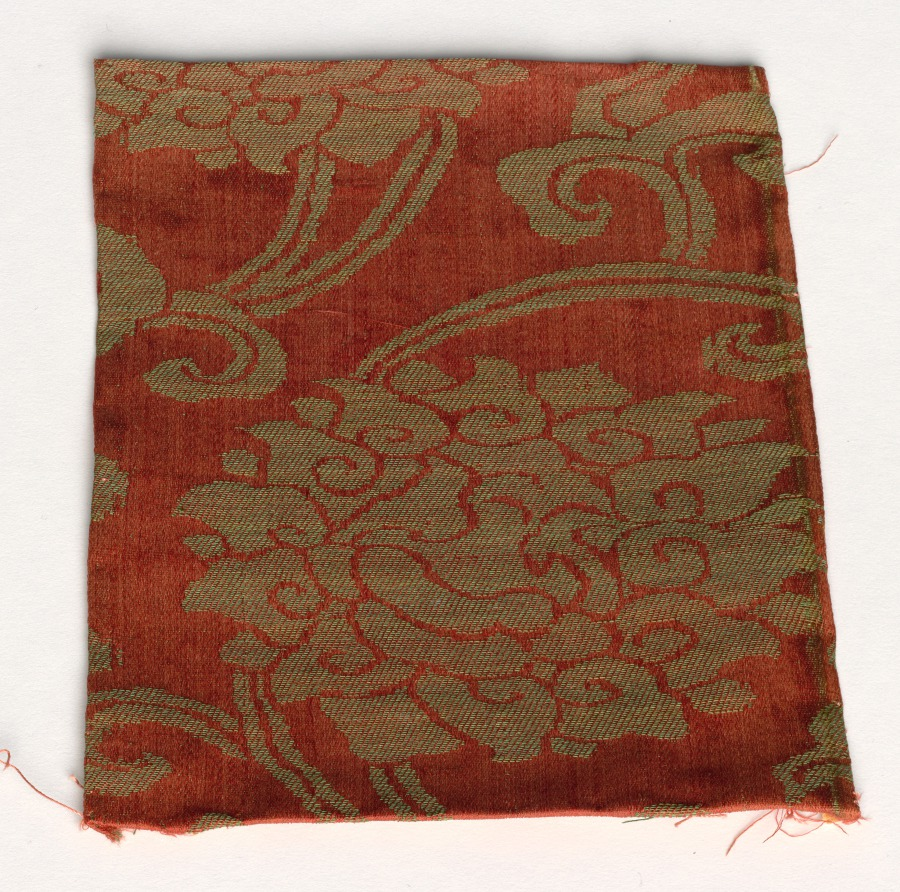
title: Textile Fragment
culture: Japan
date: 1800s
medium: silk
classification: Textile